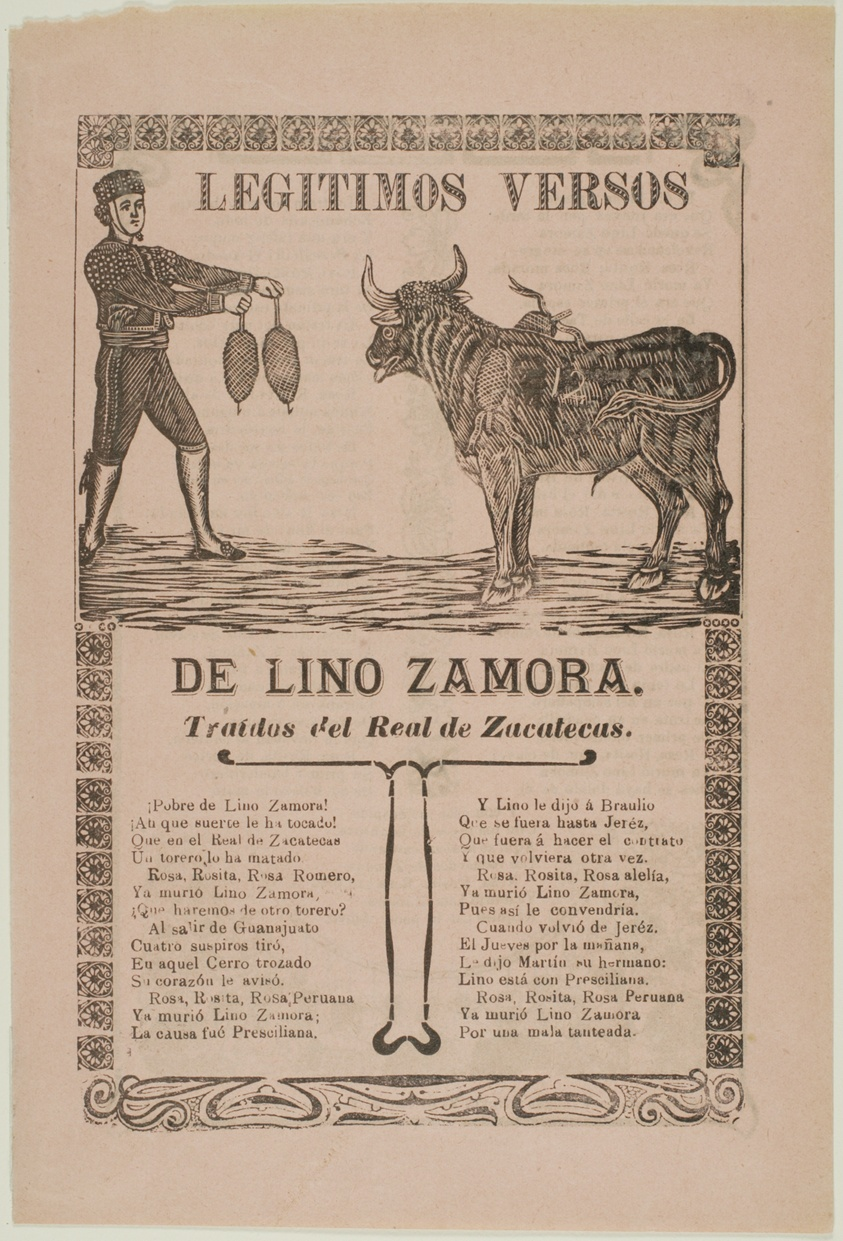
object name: Print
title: True Verses about Lino Zamora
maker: José Guadalupe Posada (Mexican, 1852-1913); or Manuel Manilla (Mexican, 1830-c. 1900)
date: 1911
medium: Relief engraving or photo relief etching on pink wove paper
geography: Mexico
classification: relief etching; print; prints and drawing